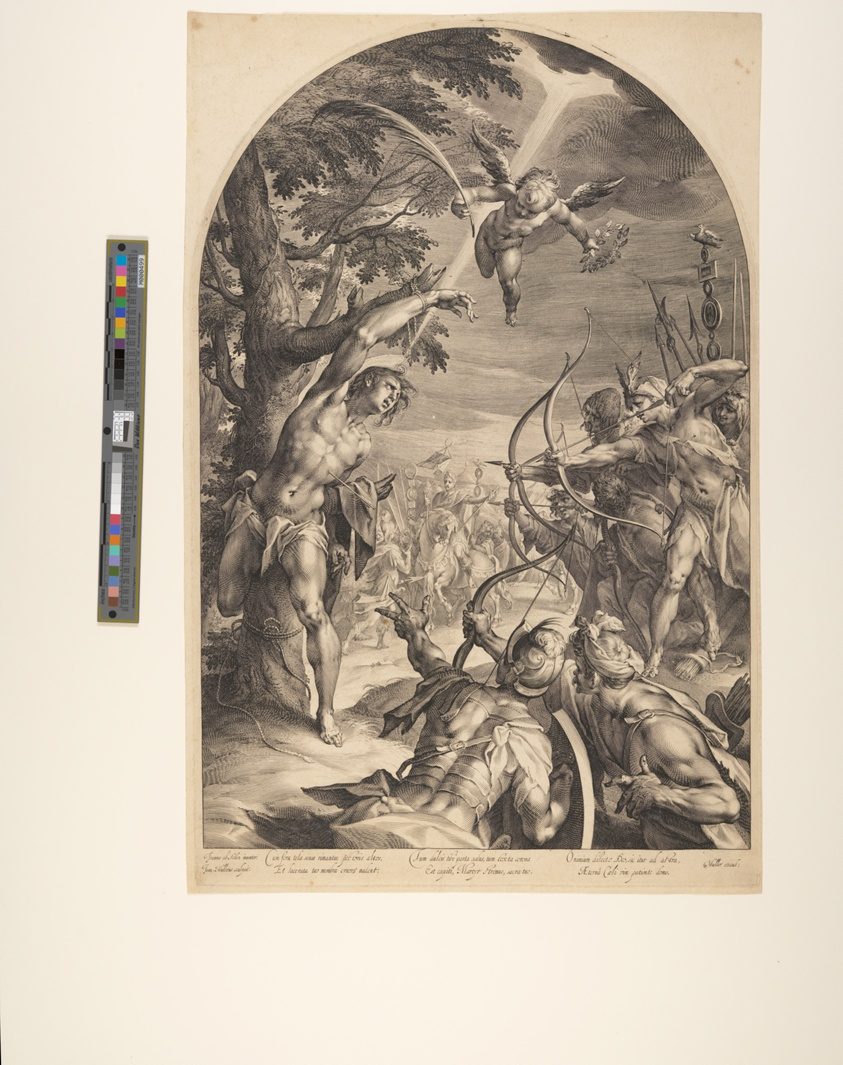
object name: Print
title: Martyrdom of Saint Sebastian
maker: Jan Harmensz Muller (Dutch, 1571–1628); after Hans von Aachen (German, 1552–1615)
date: c. 1600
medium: Engraving on ivory laid paper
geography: Netherlands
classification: engraving; paper; print; prints and drawing